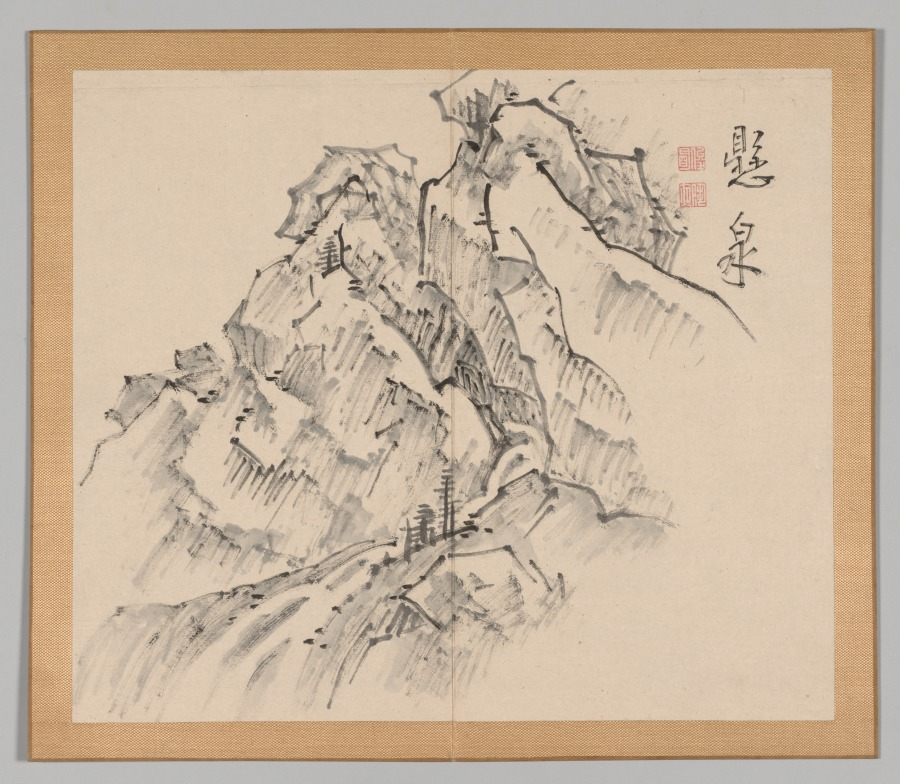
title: Reverberations of Taiga, Volume 1 (leaf 26)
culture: Japan, Edo period (1615–1868)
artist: Aoki Shukuya (Japanese, d. 1802)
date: mid- to late 1700s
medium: double-leaf from a pair of albums; ink and light color on paper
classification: Portfolio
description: Traditionally, young painters in Japan began their studies with an established master-painter. The master's compositions invariably became models that the apprentice copied to learn various ink and brush techniques. Shukuya was a pupil of the famous Kyoto artist Ikeno Taiga, whose style is reflected in these sketches of rocks, trees, and mountains.